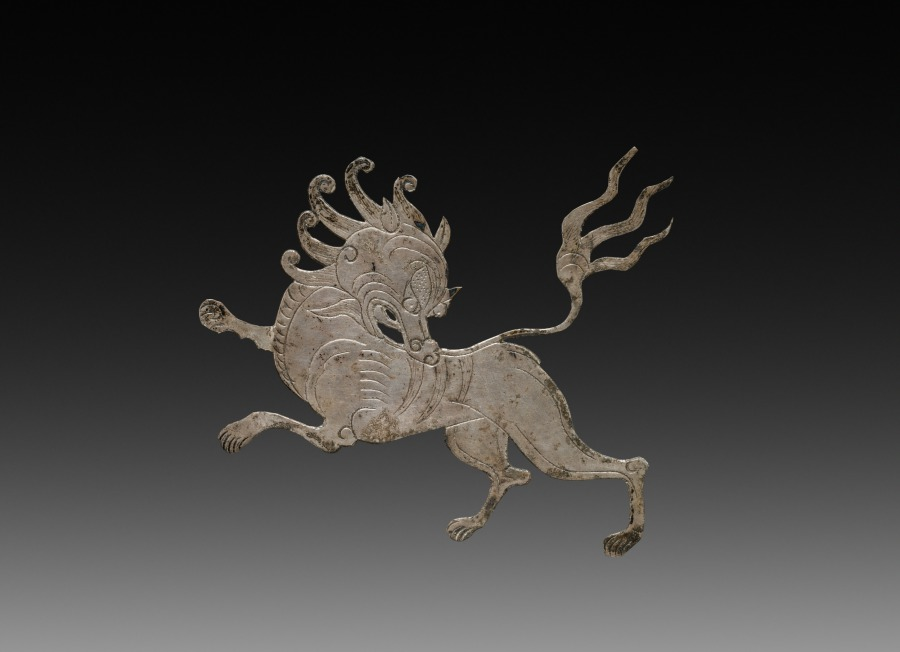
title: Inlay for a Mirror or Box: shih-shih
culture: China, Tang dynasty (618-907) - Song dynasty (960-1279)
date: c. 900–1000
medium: beaten silver with chased details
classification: Metalwork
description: The p'ing-t'o technique of inlaying gold and silver foil on lacquer produced luxurious articles of elegance and fragility. These stray silver inlays were originally mounted on a mirror back or a cosmetic box whose lacquered surface has disintegrated. They combine auspicious symbols of Indian and Chinese origin--human-headed birds whose melodies filled the Buddhist paradise, and bird-riding deities who inhabited the skies of Taoist mythology. Like these imaginary beings, the lions were probably paired in a radial design; at least one has been lost.